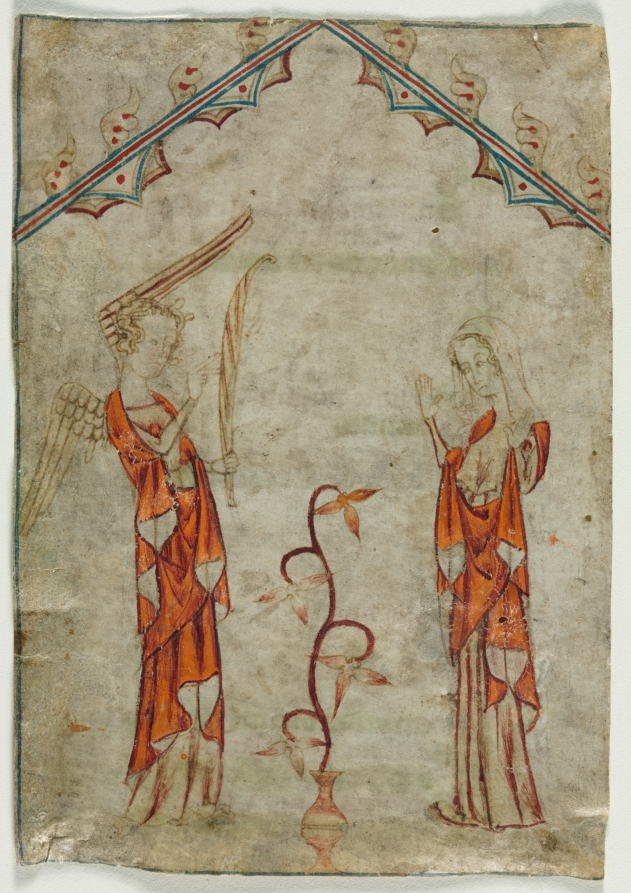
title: Leaf Excised from a Psalter: The Annunciation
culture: England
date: c. 1325–50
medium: ink, tempera, and gold on vellum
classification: Manuscript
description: This miniature of the Annunciation to Mary was taken from a psalter containing the 150 sacred songs or hymns from the Book of Psalms found in the Bible. Psalters were among the most popular books of the Middle Ages, used for daily church services in monasteries and for private devotion. The leaf from this liturgical manuscript probably came from England and was made around the time of the Black Death. In the past, manuscripts were often disassembled by owners and dealers to sell the single miniatures for a larger profit. Thus, the original cannot be reconstructed today.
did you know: When the previous owner first saw this leaf he was struck by the expression on the Virgin's face; according to him, "I could not resist the purchase of the page."